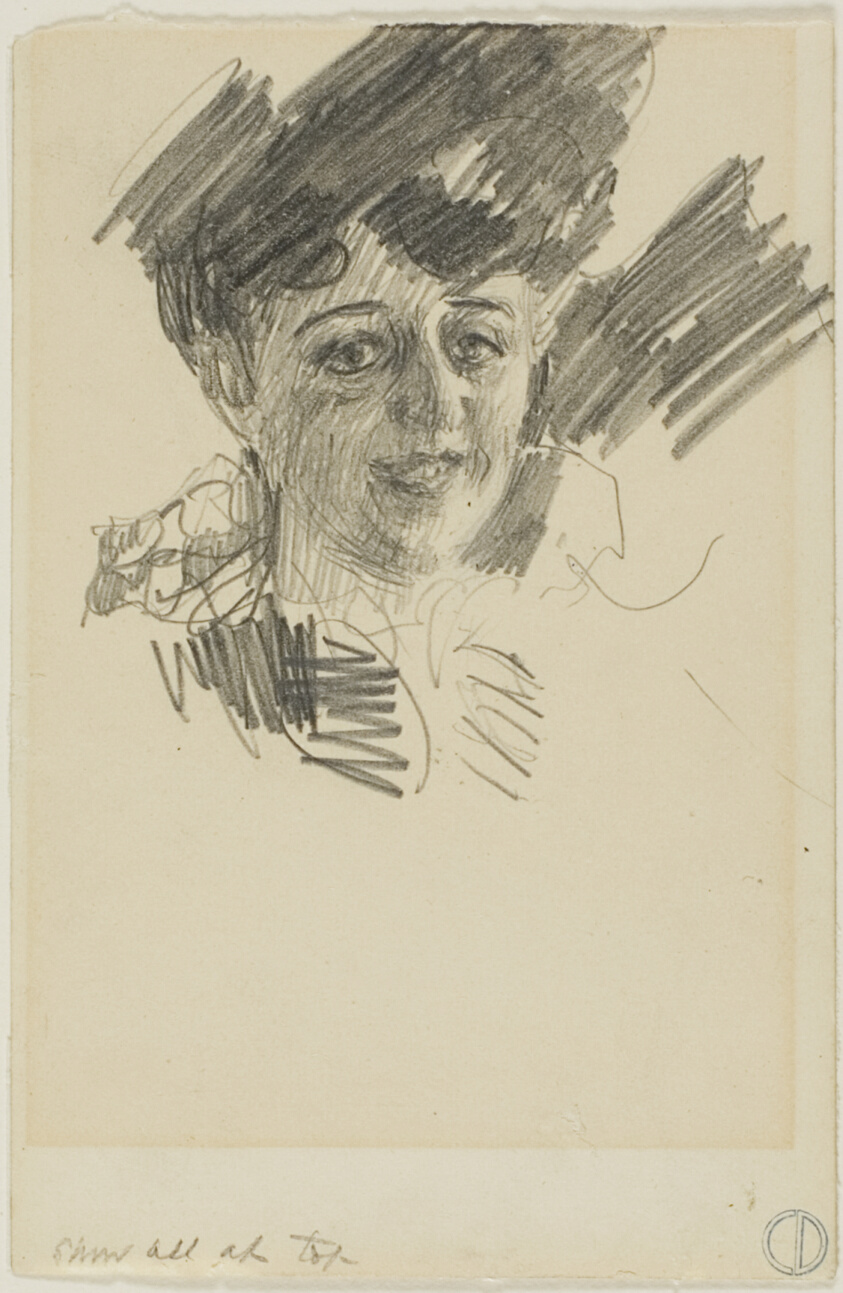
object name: Drawing and Watercolor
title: Head of a Woman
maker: Anders Zorn (Swedish, 1860-1920)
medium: Graphite. with black crayon, on cream wove paper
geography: Sweden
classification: graphite; drawings (visual works); prints and drawing